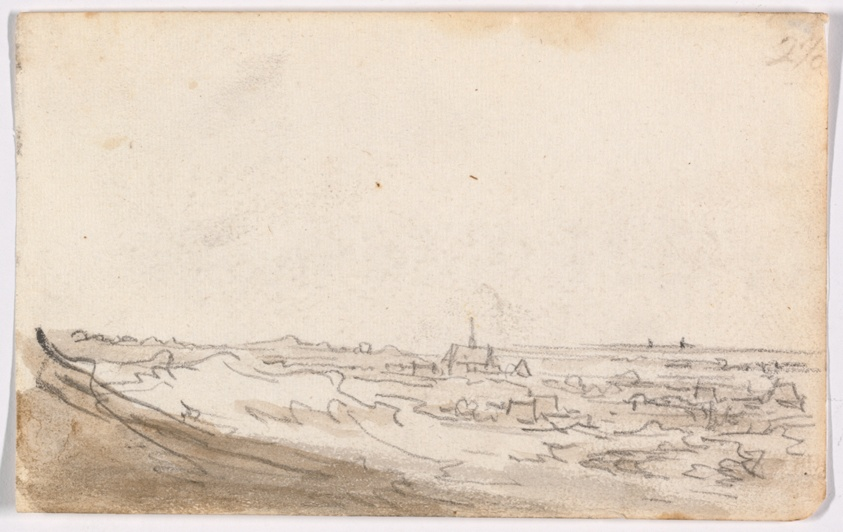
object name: Drawing and Watercolor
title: Panorama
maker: Jan van Goyen (Dutch, 1596-1656)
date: 1650–51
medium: Black chalk, with brush and brown wash, on ivory laid paper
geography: Netherlands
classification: chalk; drawings (visual works); prints and drawing